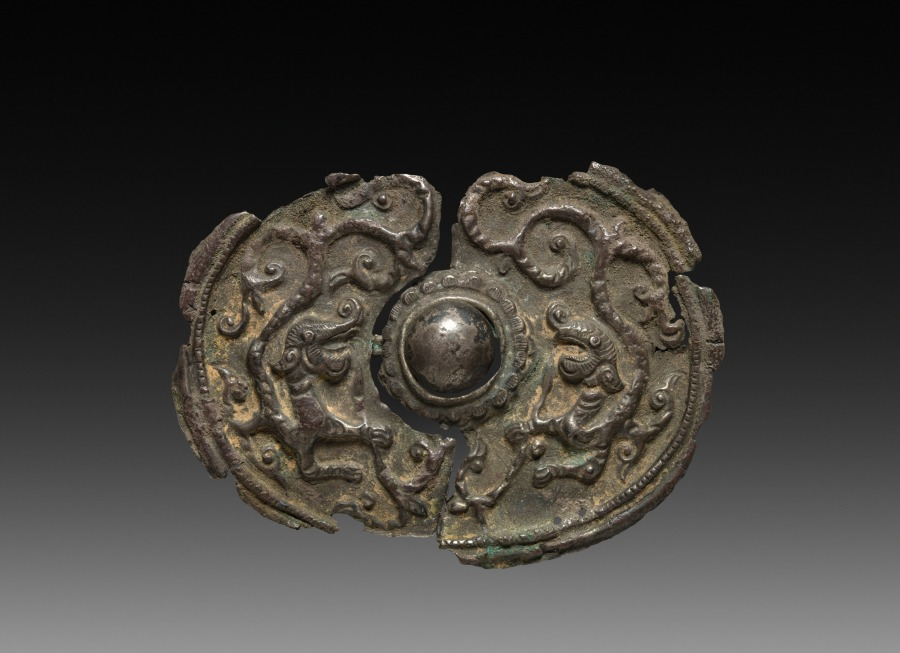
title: Buckle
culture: China, Tang dynasty (618-907)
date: 618–907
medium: silver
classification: Jewelry